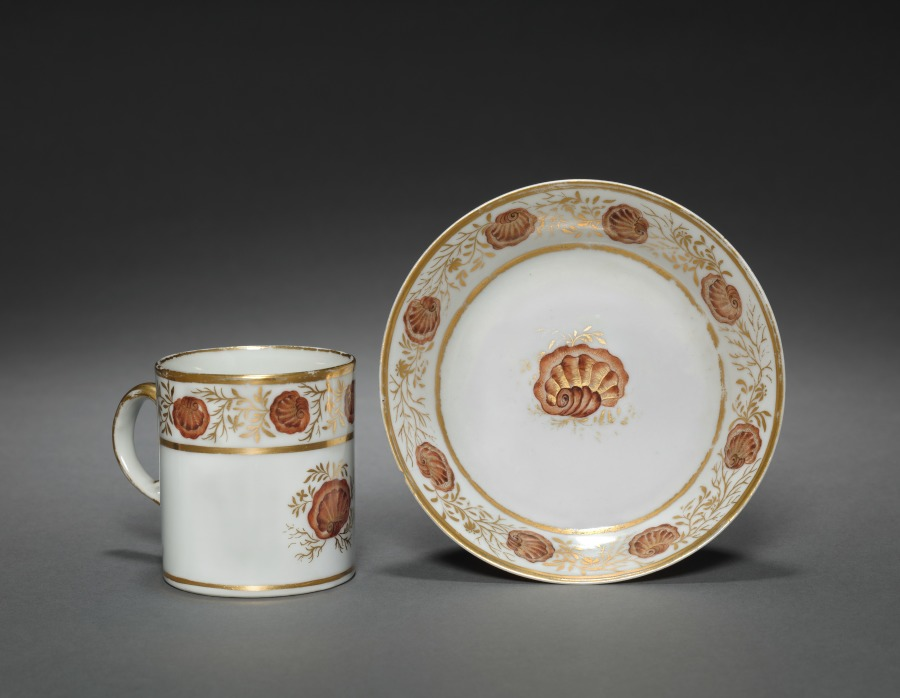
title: Cup from Oliver Wolcott, Jr. Tea Service (2 of 6)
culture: Chinese Export porcelain, late 18th-early 19th century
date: 1785–1805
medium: porcelain, sepia enamel, gold leaf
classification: Ceramic